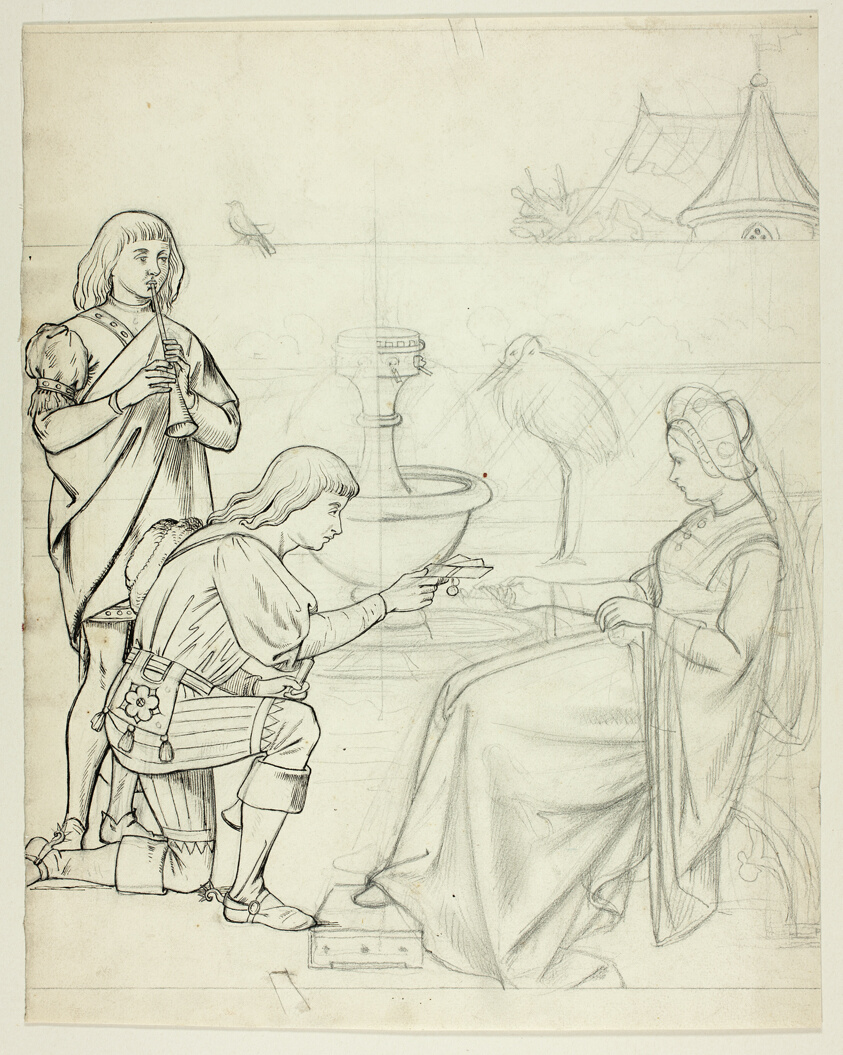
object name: Drawing and Watercolor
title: Young Man Bringing a Message to the Queen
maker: Henry Stacy Marks (English, 1829-1898)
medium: Pen and black ink over graphite on cream wove paper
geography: England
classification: pen and ink drawings; drawings (visual works); prints and drawing